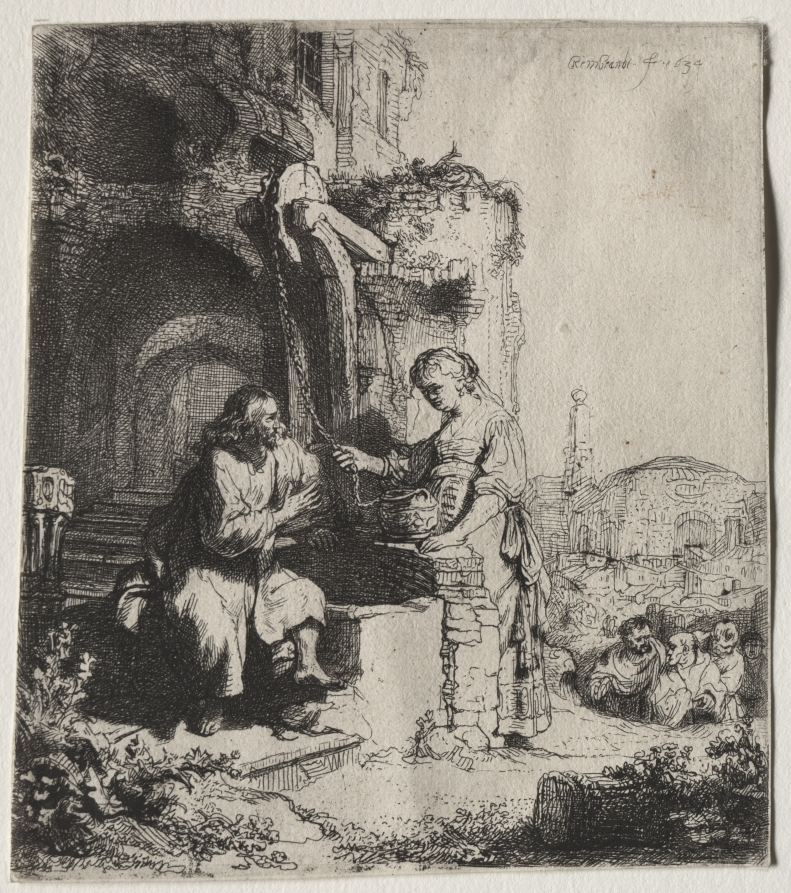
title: Christ and the Woman of Samaria Among Ruins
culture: Netherlands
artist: Rembrandt van Rijn (Dutch, 1606–1669)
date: 1634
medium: etching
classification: Print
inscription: upper right, in plate: Rembrandt f. 1634 ; VERSO, upper left, in graphite: 9[sideways]; upper right, in graphite: 6159[sideways]; lower left, in graphite: AFfK[underlined]; lower left, in graphite: u40270; lower center, in graphite: 78; lower center, in graphite: Sp.[underlined]; lower center, in graphite: B.71. Rov.I; lower center, in graphite: 62639